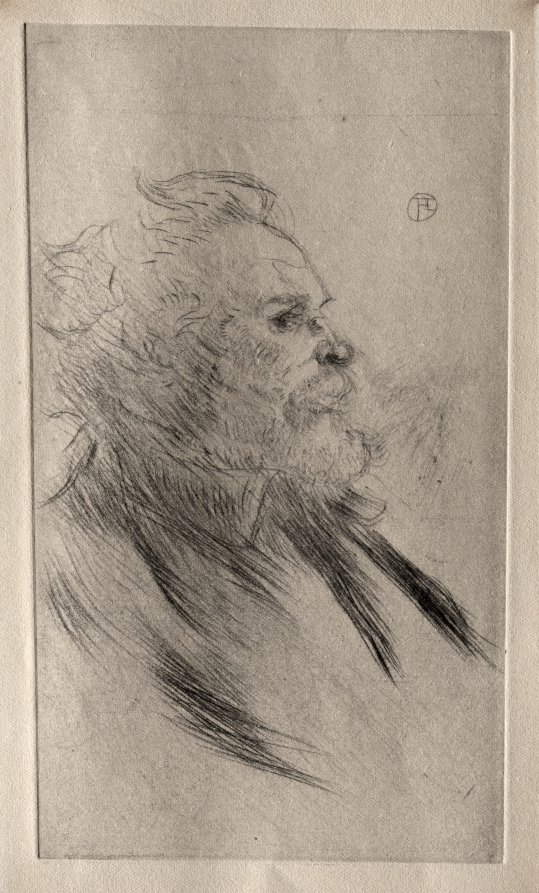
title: Charles Maurin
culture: France, 19th century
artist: Henri de Toulouse-Lautrec (French, 1864–1901)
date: 1898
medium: drypoint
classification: Print